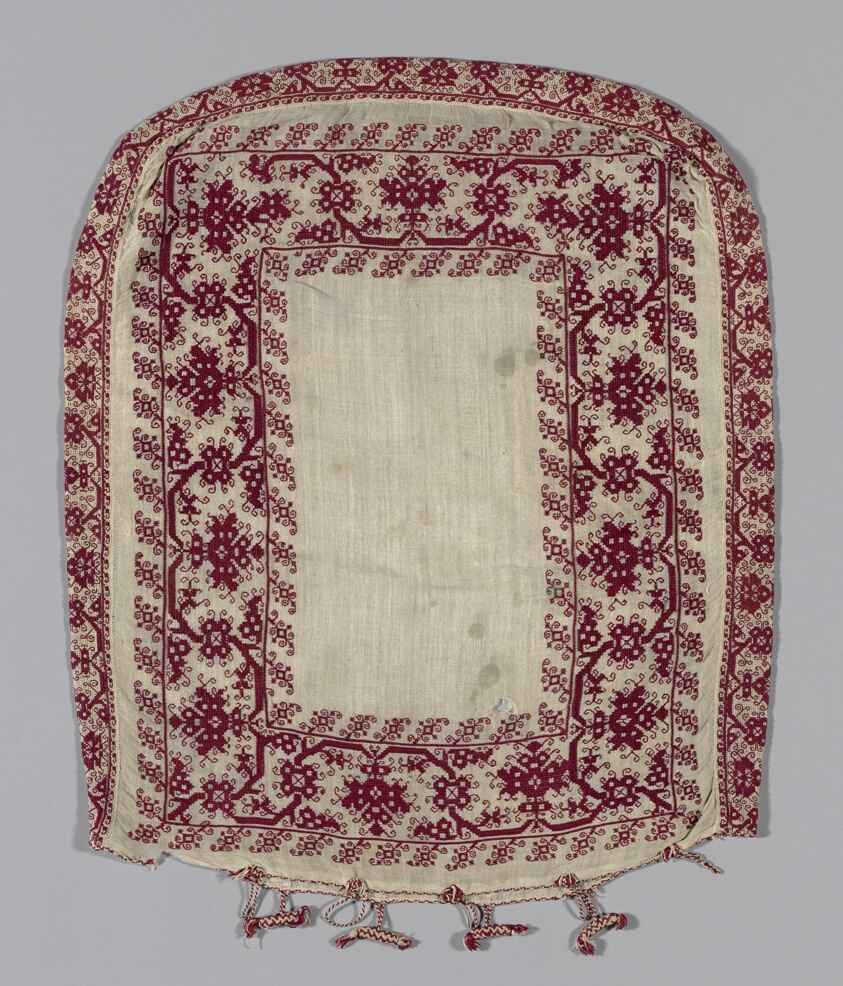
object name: Textile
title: Pillow Cover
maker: Italy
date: 16th/17th century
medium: linen and silk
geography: Italy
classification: textile; needlework (visual works)